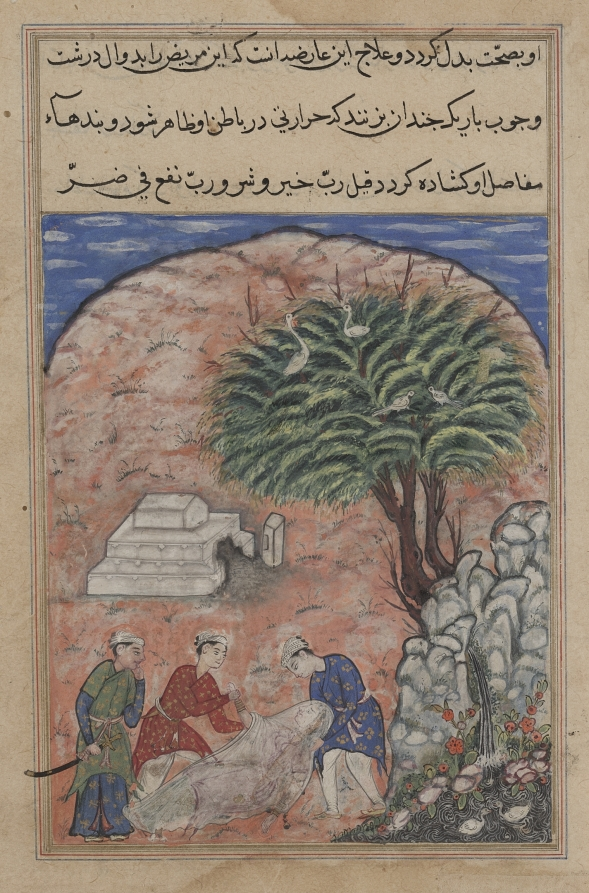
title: The suitors take the devotee’s daughter out of her tomb after breaking it open, when the physician discovers she is still alive, from a Tuti-nama (Tales of a Parrot): Twentieth Night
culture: Mughal India, court of Akbar (reigned 1556–1605)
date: c. 1560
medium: gum tempera, ink, and gold on paper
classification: Painting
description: The three suitors hold the lifeless body of the woman they intended to marry. She is wrapped in a diaphanous burial shroud, and her tomb stands empty in the background. When the suitors realize that the woman is not dead, they proceed to attempt to revive her.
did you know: The three pairs of birds in the tree and pond allude to the three suitors.